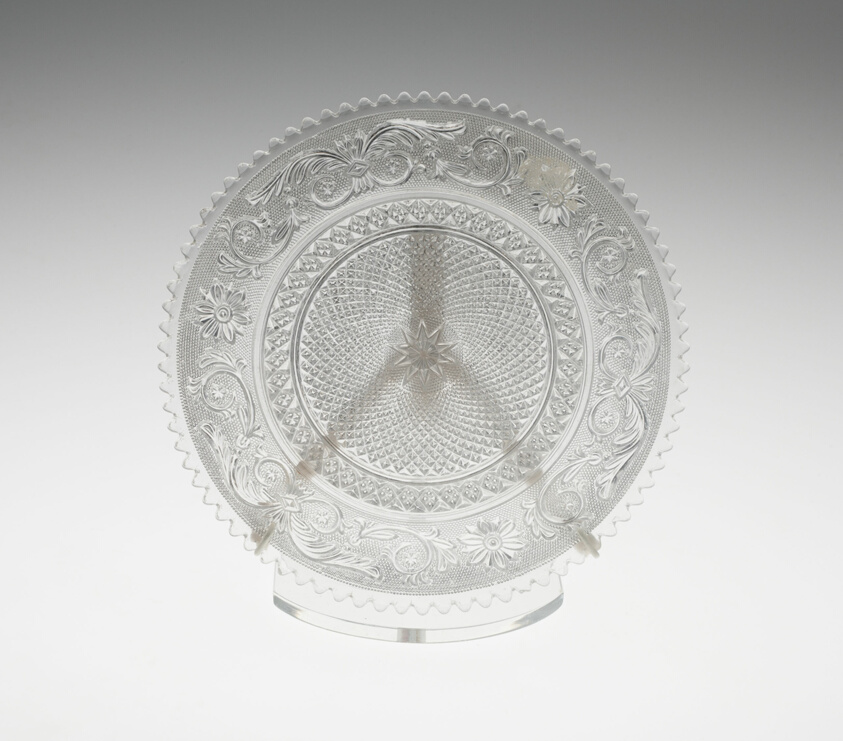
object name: Glass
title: Plate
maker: Baccarat Glassworks (French, founded 1764)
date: c. 1830/60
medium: Glass; pressed and cut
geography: France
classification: plate (general, dish); glass; dish (vessel); european decorative arts